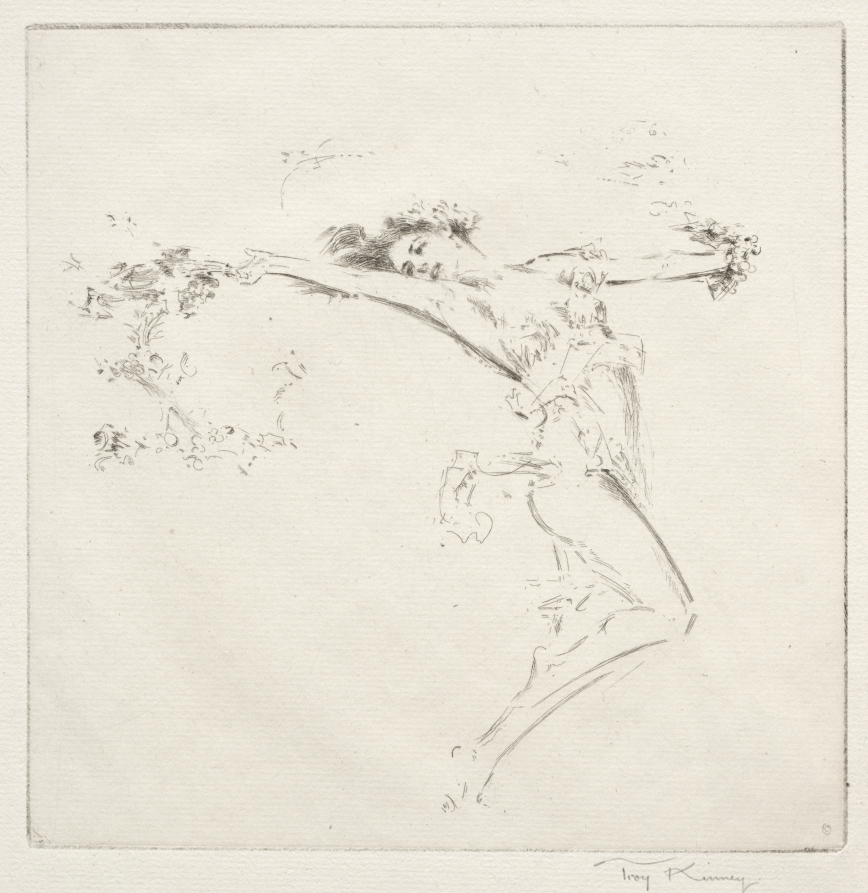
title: Soul of the Vine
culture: America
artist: Troy Kinney (American, 1871–1938)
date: 1921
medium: drypoint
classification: Print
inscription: Signed in pencil on bottom right beneath image: Troy Kinney